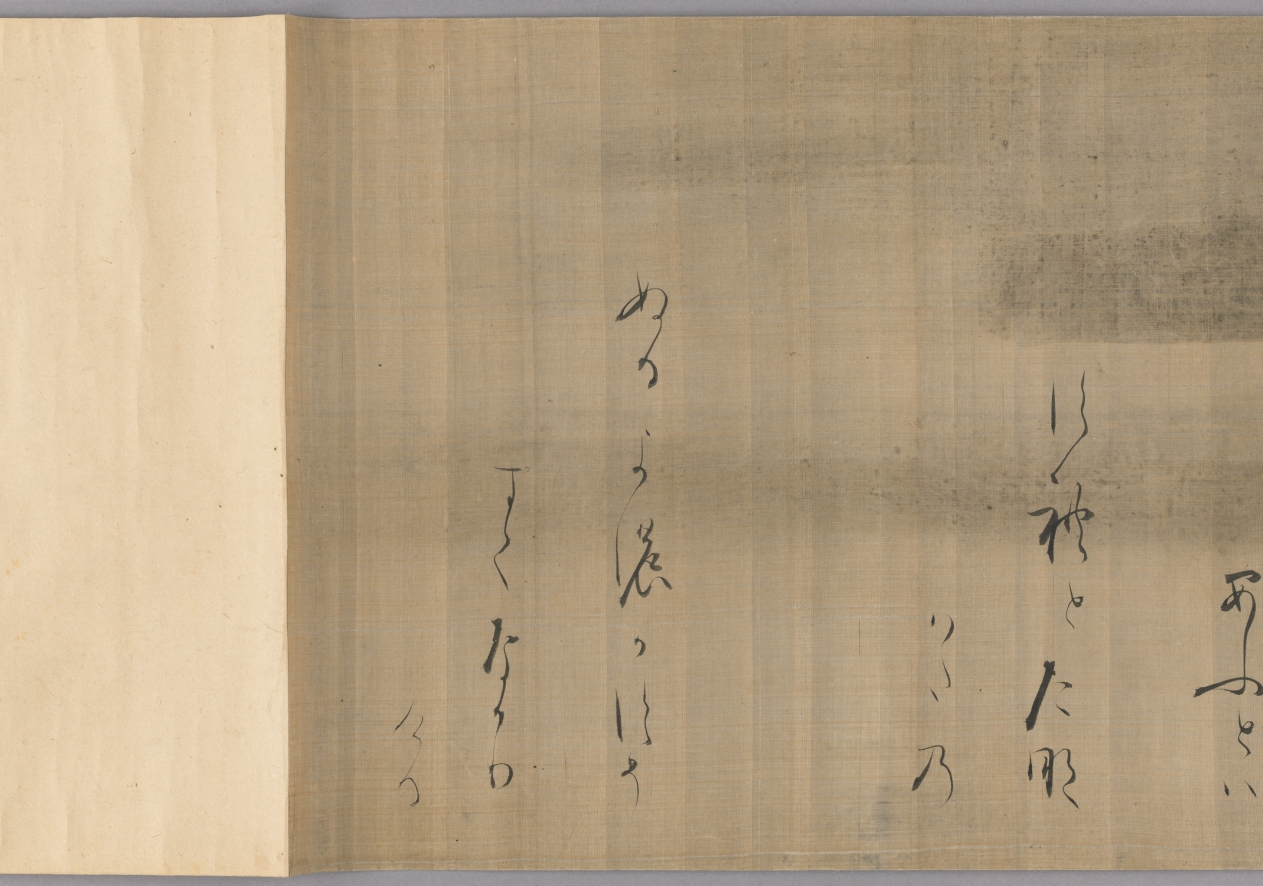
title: Selections from the Collection of Japanese Poems from Ancient and Modern Times (Kokin wakashū) with Design of Pines Along the Shore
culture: Japan, Momoyama period (1573-1615) to Edo period (1615-1858)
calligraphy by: Hon'ami Kōetsu (Japanese, 1558–1637)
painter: attributed to Tawaraya Sōtatsu (Japanese, c. 1570–c. 1640)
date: 1600s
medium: handscroll; ink on silk with gold and silver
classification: Calligraphy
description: The calligrapher and craftsman Hon’ami Kōetsu frequently collaborated with Tawaraya Sōtatsu, a painter who ran a studio that produced fans and screens. Sōtatsu’s work featured abstracted and flattened shapes, fields of color and gold, and asymmetry. In particular, motifs that appeared in small scale, such as flora and fauna, in early decorated Japanese papers were painted in a larger scale—blown up as if seen under a magnifying glass. For this handscroll, Kōetsu brushed poems from the autumn section of a poetry anthology onto silk with a landscape of pines in gold and silver likely painted by Sōtatsu.